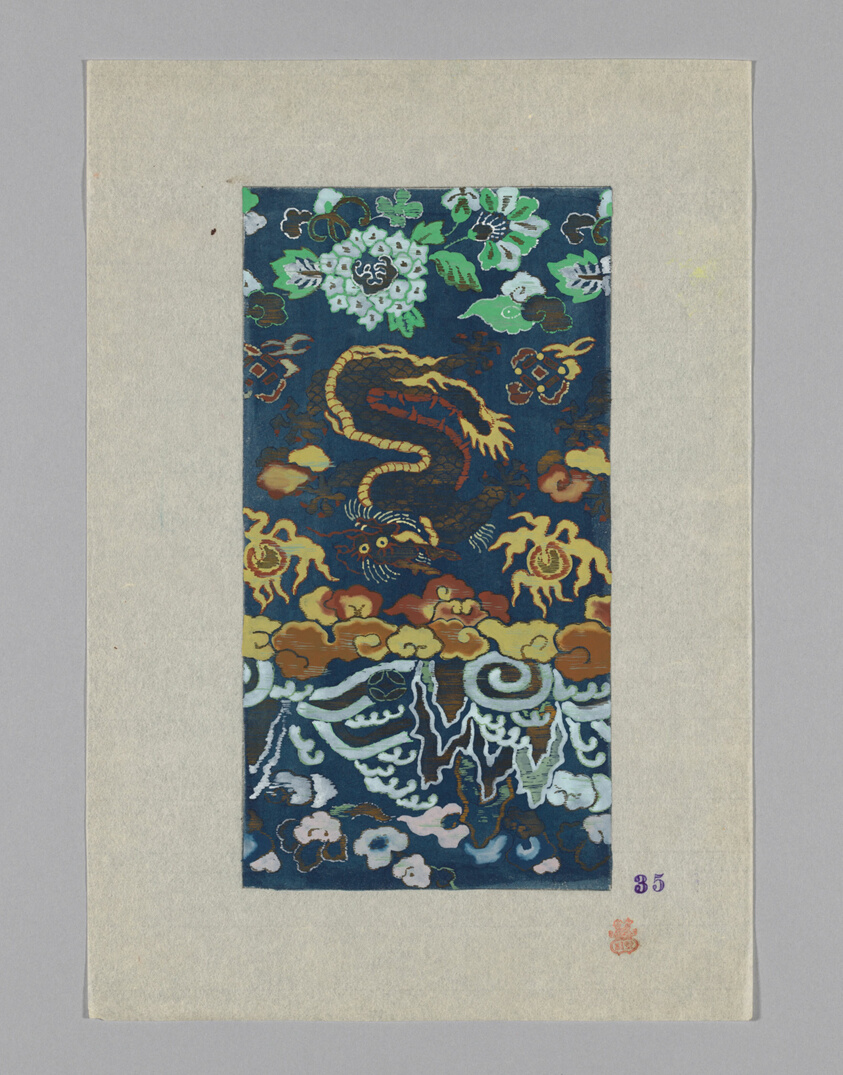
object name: Drawing and Watercolor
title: Design on Paper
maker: Japan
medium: Paper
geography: Japan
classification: textile; accessory - paper design; watercolor; paper